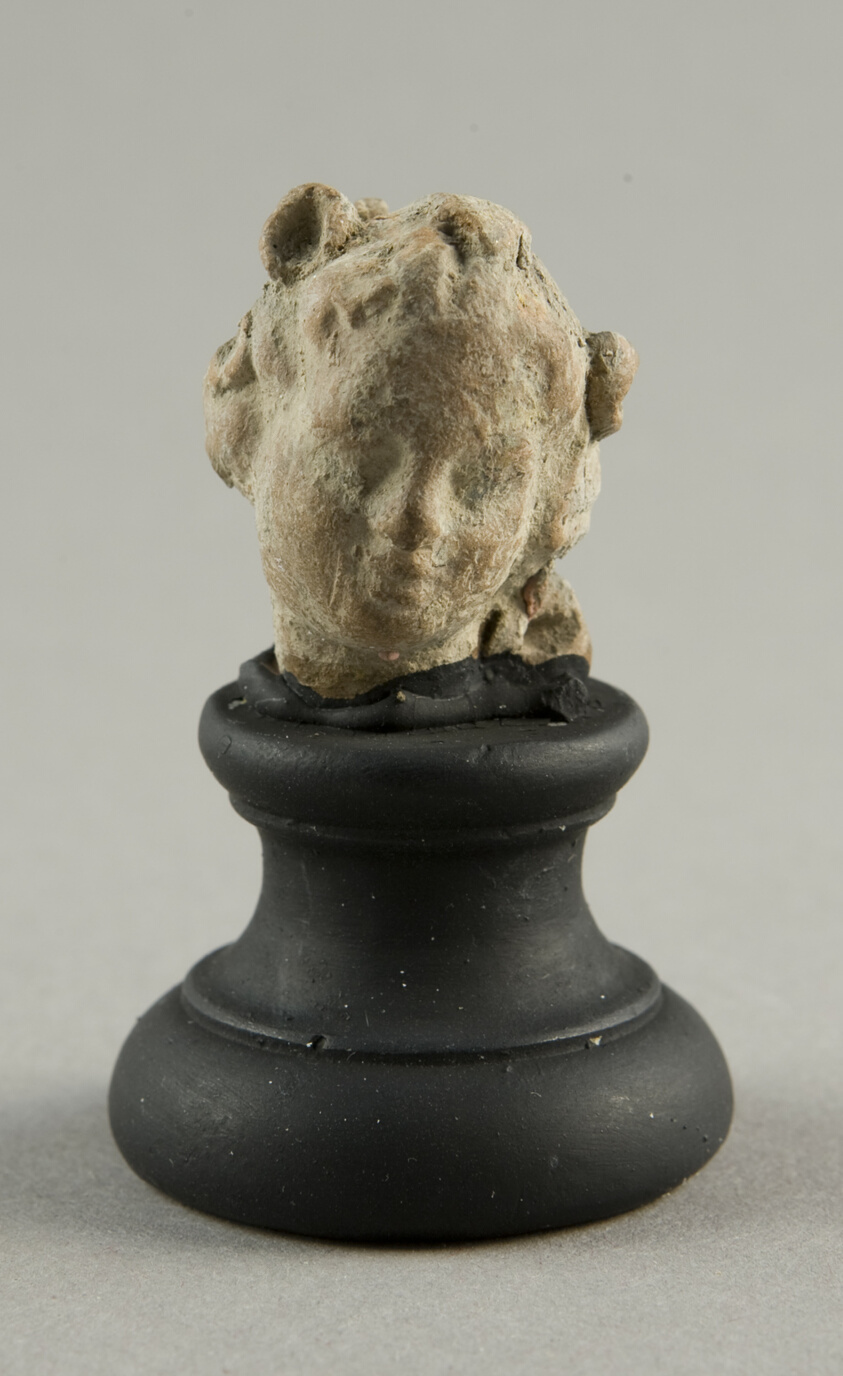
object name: Sculpture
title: Head of a Child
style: greek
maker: Greek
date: 3rd-1st century BCE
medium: terracotta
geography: Greece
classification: earthenware; ceramics; sculpture; ancient art